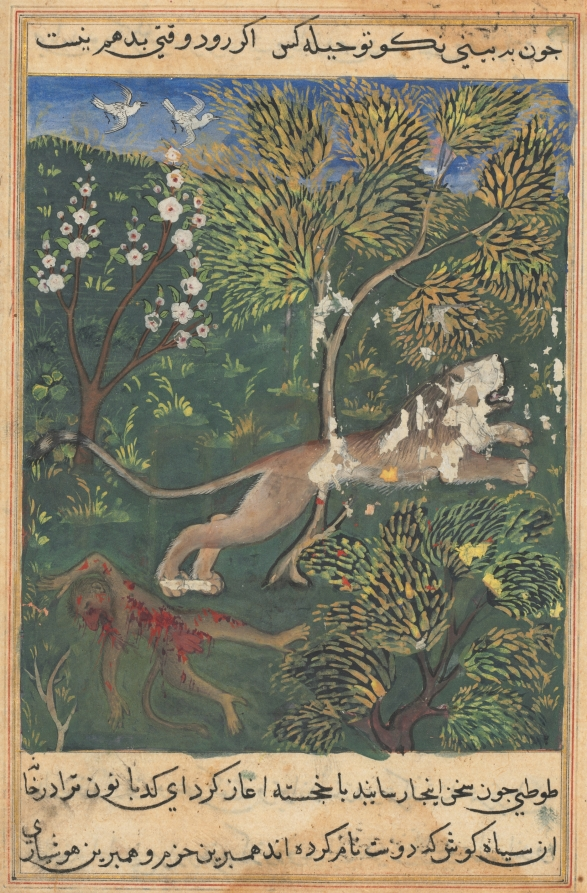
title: The lion, suspecting treachery on the part of the monkey, slays him and flees, from a Tuti-nama (Tales of a Parrot): Twenty-ninth Night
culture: Mughal India, court of Akbar (reigned 1556–1605)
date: c. 1560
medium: gum tempera, ink, and gold on paper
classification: Painting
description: The monkey, who once served as the lion’s chamberlain, lies mauled and dead in the meadow. The lion, who was once a formidable ruler, has become convinced that that the monkey betrayed him. In reality, the lion fell for a trick laid by a family of clever lynx who invaded his den.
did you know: A male torso, visible under the chipped paint, indicates this page was intended for another picture.